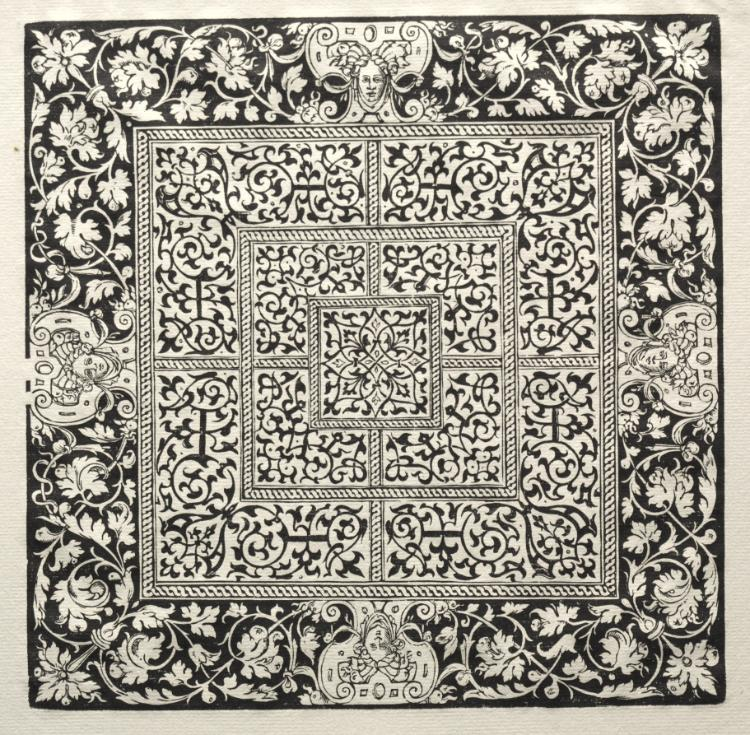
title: A gaming board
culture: Germany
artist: Peter Flötner (German, 1485–1546)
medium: woodcut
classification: Print